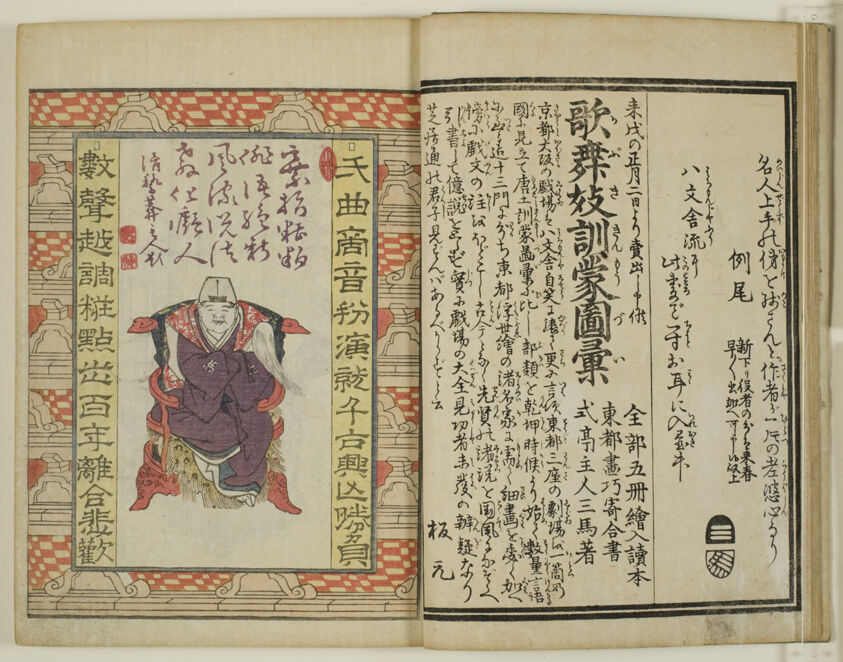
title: Yakusha Sangai Kyo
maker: Utagawa Toyokuni I (Japanese, 1769–1825)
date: 1801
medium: Book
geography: Japan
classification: book; asian art